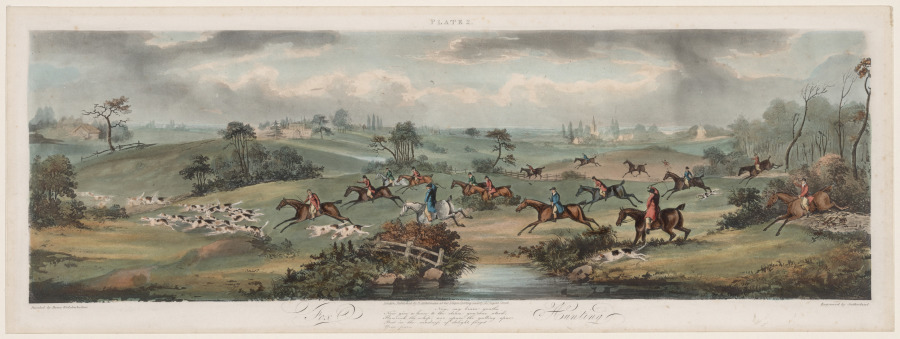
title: Fox Hunting, No. 2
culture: England, 19th century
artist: Thomas Sutherland (British, 1785–1838)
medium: aquatint and etching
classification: Print